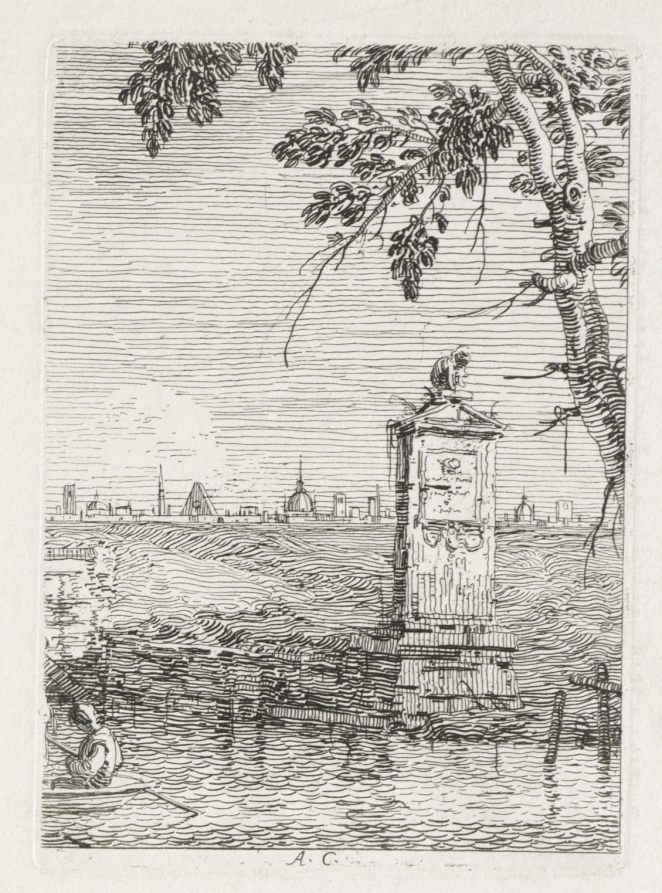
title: Views: The Little Monument under a Tree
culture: Italy, Venice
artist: Antonio Canaletto (Italian, 1697–1768)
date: 1735–1746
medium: etching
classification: Print